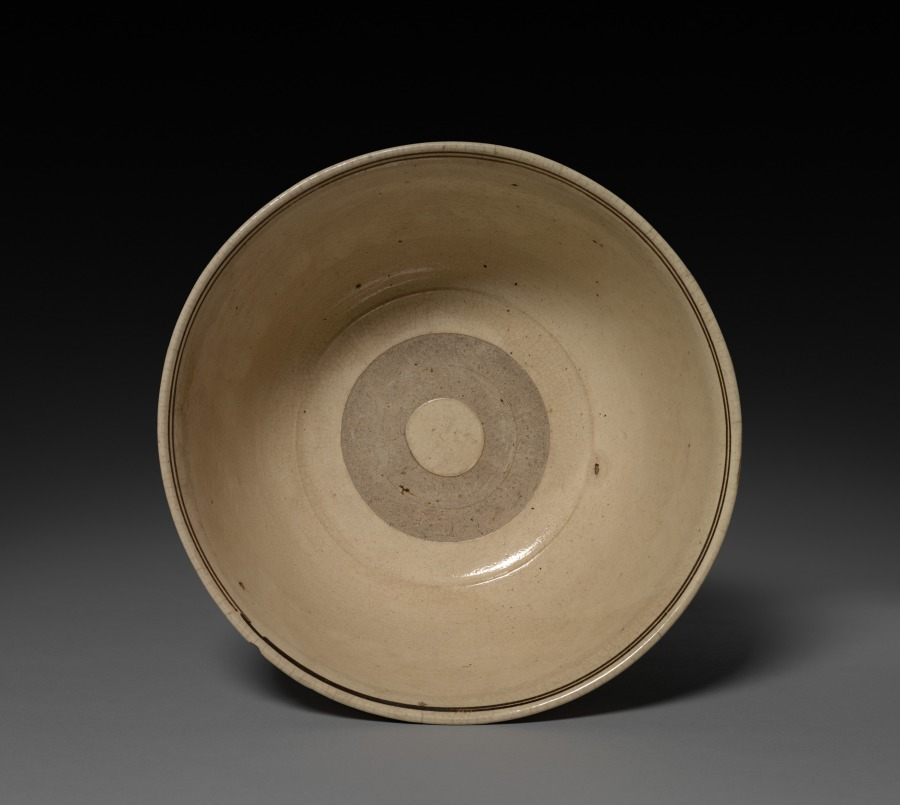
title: Bowl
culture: China, Ming dynasty (1368–1644)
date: 1368–1644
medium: stoneware, Cizhou ware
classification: Ceramic